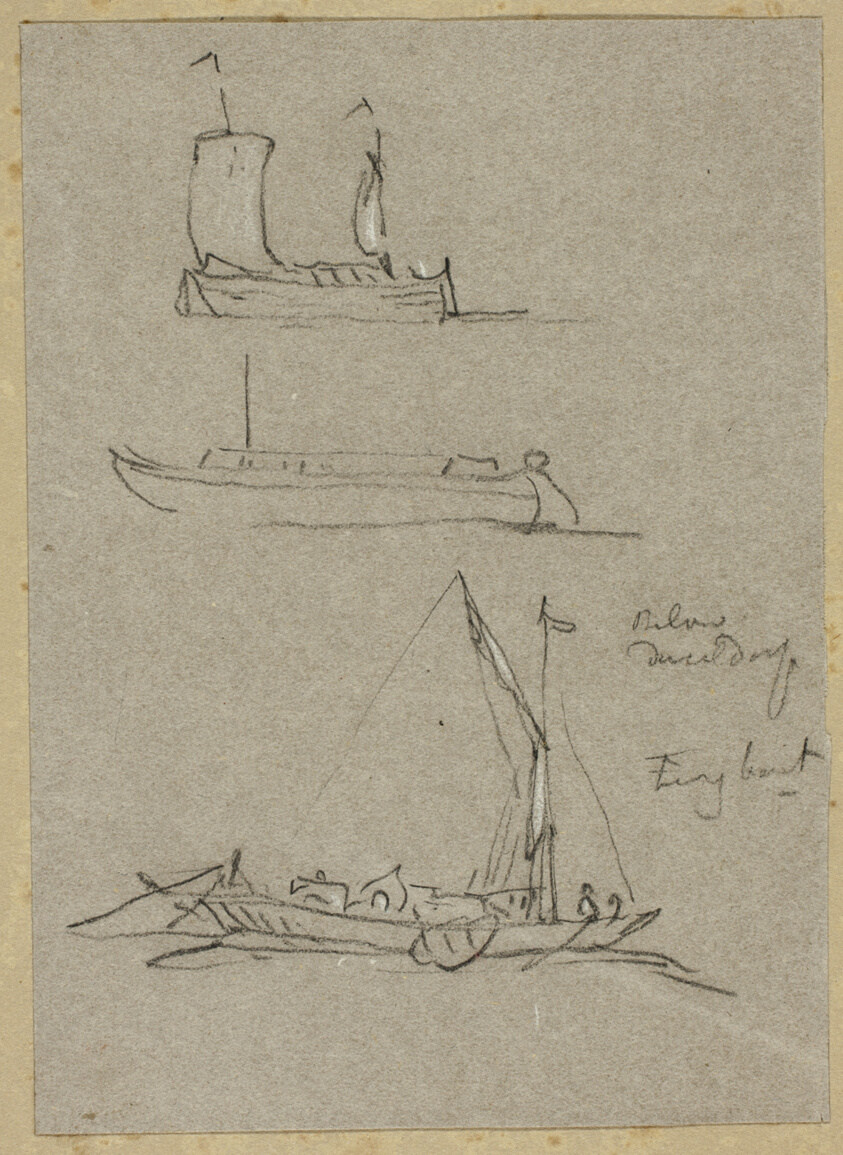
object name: Drawing and Watercolor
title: Three Sketches of Dusseldorf River Boats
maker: William Alfred Delamotte (English, 1775-1863)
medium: Black chalk, highlighted with white chalk, on gray wove paper, tipped onto tan wove paper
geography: England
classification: chalk; drawings (visual works); prints and drawing